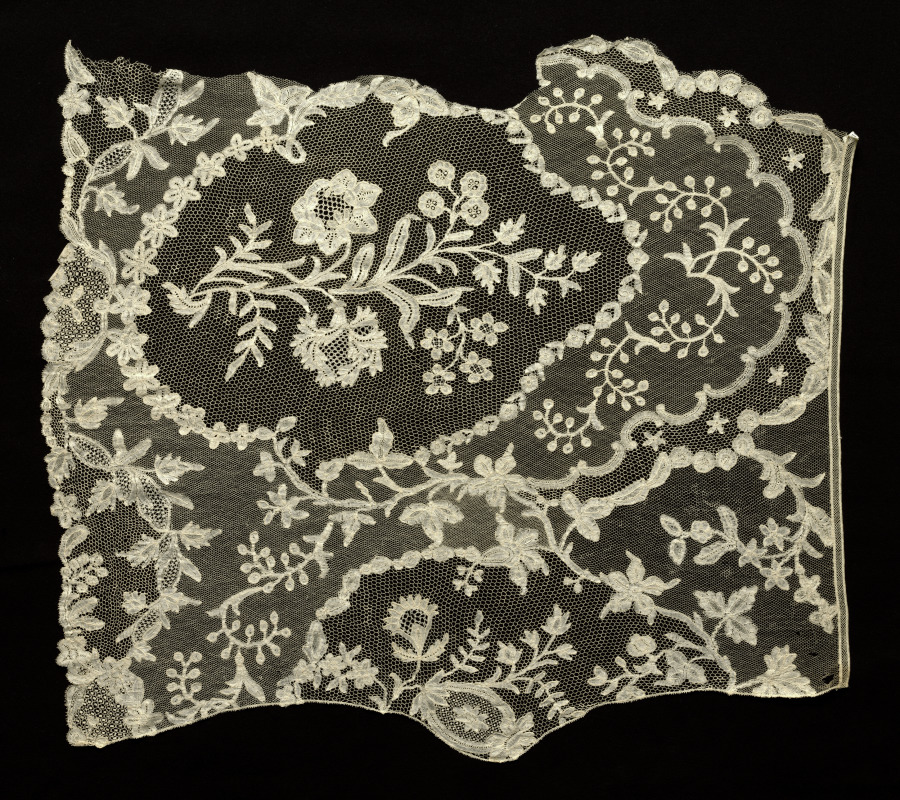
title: Fragment of a Lace Flounce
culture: Belgium, Brussels(?)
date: 1700s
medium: lace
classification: Lace